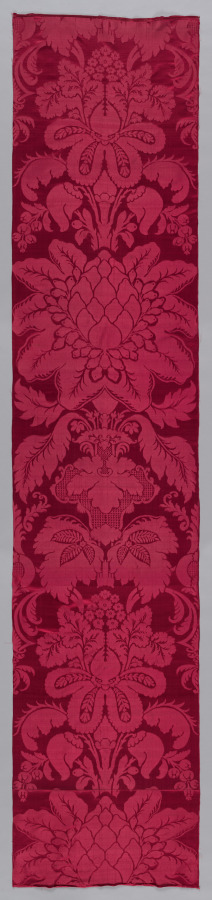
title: Two Large Damask Cloths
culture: Italy, 17th century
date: 1600s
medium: damask, silk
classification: Textile